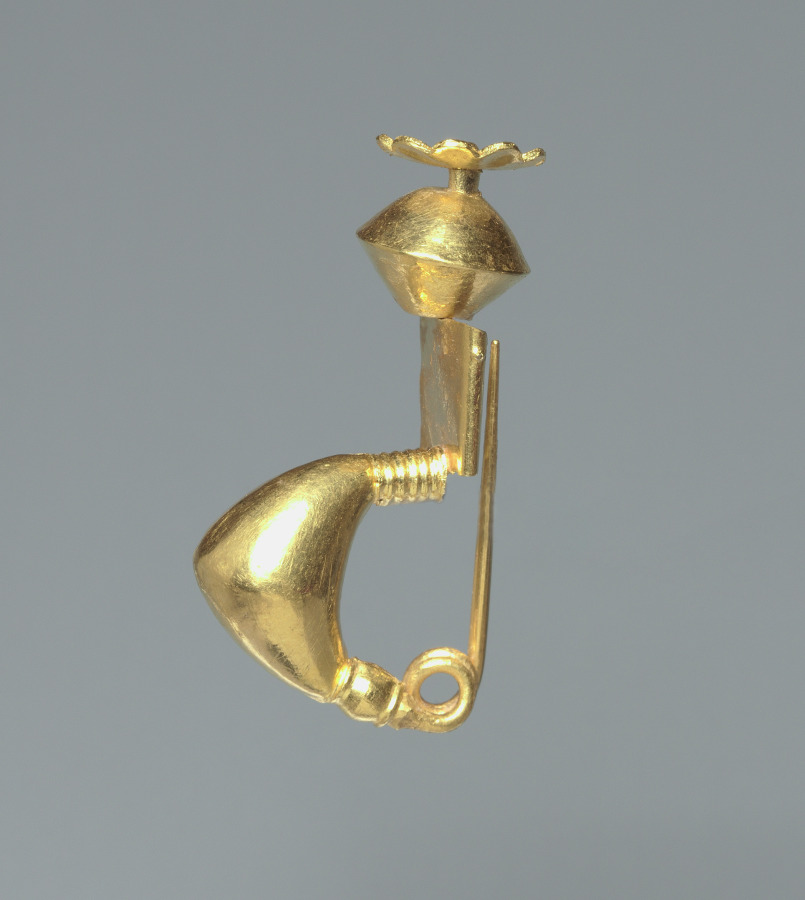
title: Fibula (Pin)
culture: Etruscan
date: 300s BCE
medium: gold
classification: Jewelry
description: This gold fibula consists of a leech-shaped bow attached to a pin, a plaque, and a biconical bead. A nine-petaled flower tops the bead. The fibula was likely used to fasten clothes by gathering fabric together. Unlike silver and bronze, gold does not easily tarnish.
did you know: This fibula was cast in three parts, the bow and pin, plaque, and bead, using the lost wax method.